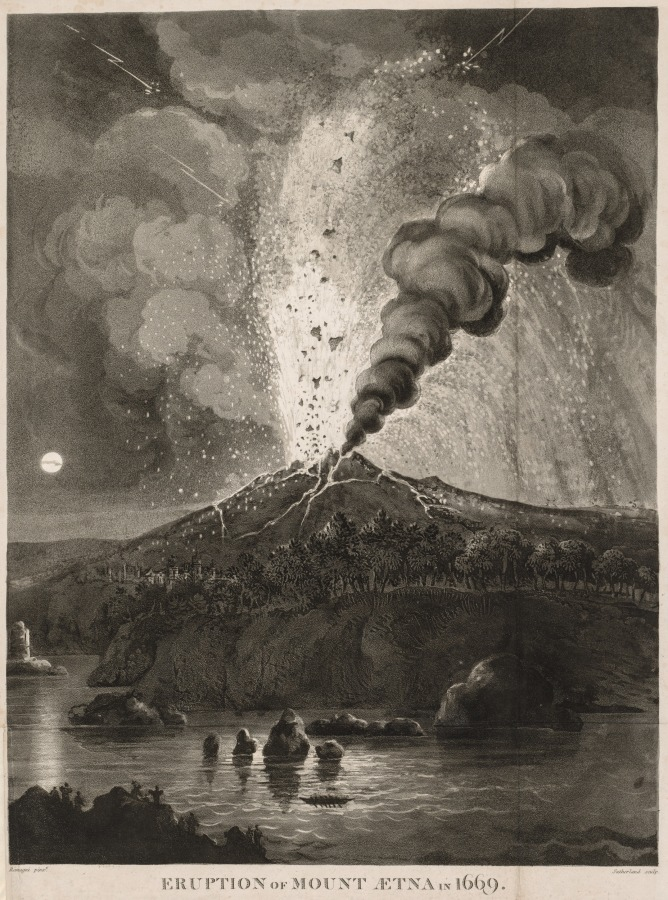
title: Eruption of Mount Aetna in 1669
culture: England, 18th century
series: Botanical Extracts: or, Philosophy of Botany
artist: Thomas Sutherland (British, 1785–1838)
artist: after Romagni (Italian?, 17th century?)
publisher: Robert John Thornton (British, 1768–1837)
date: 1809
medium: aquatint with engraving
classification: Print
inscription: Inscribed, lower left, in margin: Romagni pinxt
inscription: inscribed, lower center, in margin: ERUPTION OF MOUNT AETNA IN 1669.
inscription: inscribed, lower right, in margin: Sutherland sculp.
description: With the eruptions of Mount Etna and Mount Vesuvius in the 1700s, volcanoes entered the scientific and popular imagination of Enlightenment Europe. Scientists and philosophers theorized the origins of these spectacular displays; curious tourists visiting Italy wrote home with accounts of burning rivers and destroyed towns. The rediscovery of the ancient sites of Herculaneum and Pompeii, buried by Mount Vesuvius’s eruption in 79 CE, added further fuel to the fire. Attempting to capture the drama of these cataclysmic events, artists innovatively used the tonal range of aquatint and the white of the paper to evoke the dramatic effects of spewing hot lava and burning clouds of volcanic ash.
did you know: Active volcanoes like Mount Etna and Mount Vesuvius were a popular destination for European tourists visiting Italy in the 1700s.